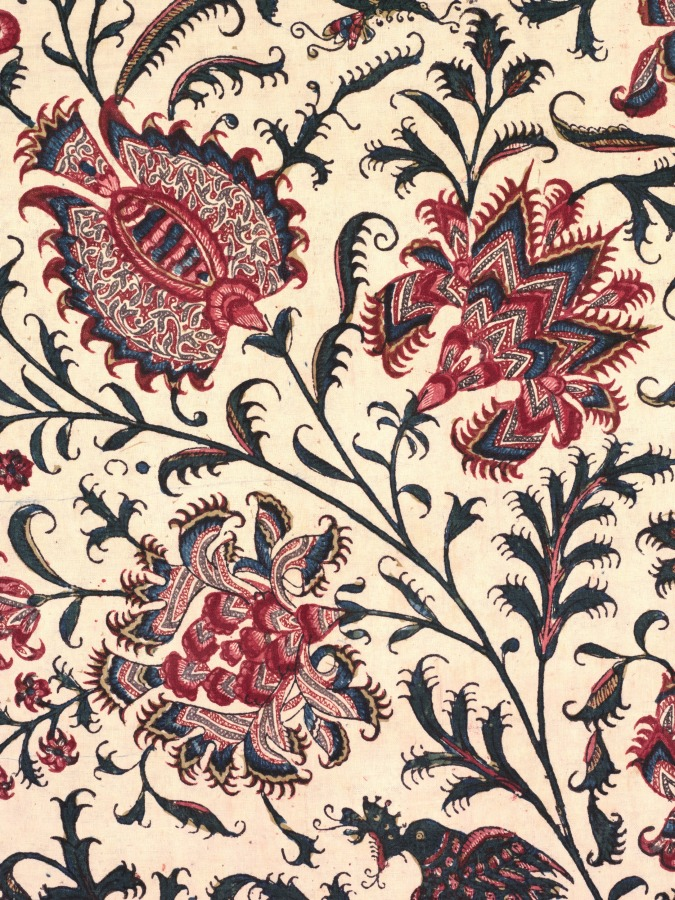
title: Chintz door curtain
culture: Iran, Isfahan, Qajar period (1779–1925)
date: 1800s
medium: Cotton: plain weave; chintz; hand drawing and block printing: bleach, mordant, and dye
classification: Textile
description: Lightweight white cotton cloth was transformed into this beautiful chintz, admired for its vibrant and durable colors, stunning pattern, fine quality, and rarity. Peacocks and a variety of birds appear amid vines with fanciful blossoms in the niche field and main border. Striking end borders feature blossoms in leaf-outlined diamonds on alternating ground colors of white, mustard, red, and blue. The complex chintz technique involving hand drawing, block printing, bleach, mordant, and dyes was developed in India. By the 1600s and 1700s, chintz was designed to target European and Asian markets and often featured large tree-of-life patterns. Chintz was also made in Iran by the 1400s, but this rare door curtain from the 1800s is among the oldest known examples.